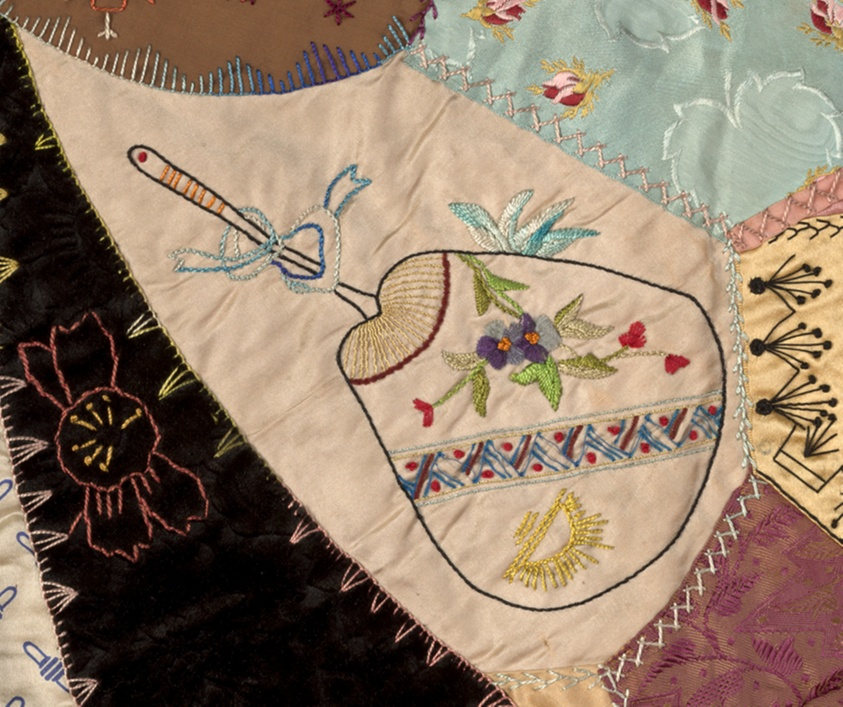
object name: Textile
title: Parlor Throw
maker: American, possibly Illinois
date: c. 1890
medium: Pieced, embroidered and painted “crazy” quilt; dyed and printed silk plain, satin, pile and patterned weave fabrics and ribbons; silk and metallic embroidery threads; paint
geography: Illinois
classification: needlework - quilt; textile